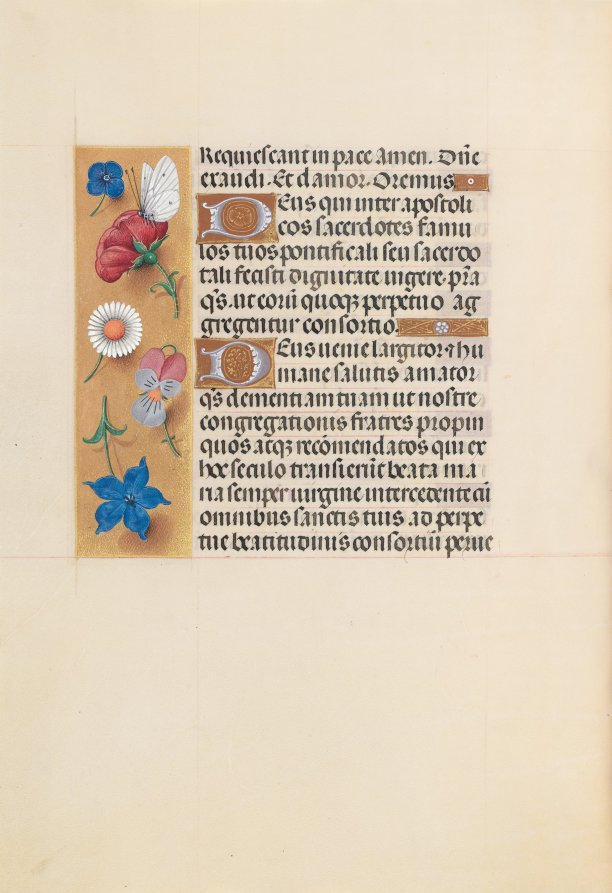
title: Hours of Queen Isabella the Catholic, Queen of Spain: Fol. 225v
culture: Flanders, Ghent and Bruges, late 15th century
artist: Master of the First Prayerbook of Maximillian (Flemish, c. 1444–1519)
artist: and Associates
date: c. 1500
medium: ink, tempera, and gold on vellum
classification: Bound Volume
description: This manuscript was illuminated by a circle of at least five highly organized manuscript painters active in the Flemish cities of Ghent and Bruges. The principal illuminator was Alexander Bening, who painted the majority of the book's miniatures. Manuscripts produced by this circle of artists are renowned for the decoration of their borders, which typically feature a rich variety of realistically-painted flowers, birds, and butterflies. This prayer book, called a book of hours, was intended not for a cleric, but for the private devotions of a lay person-in this case, Isabella the Catholic, Queen of Spain (1451-1504). Isabella's coat of arms embellishes the book's frontispiece. It is unlikely that the book was commissioned by the Queen herself; rather, she probably received it as a diplomatic gift from someone courting her patronage, perhaps Cardinal Francisco Jimenez de Cisneros. A Franciscan friar, Jimenez was dependent upon Isabella for his advancement, first to the post of Queen's confessor in 1492, and then to Archbishop of Toledo in 1495.